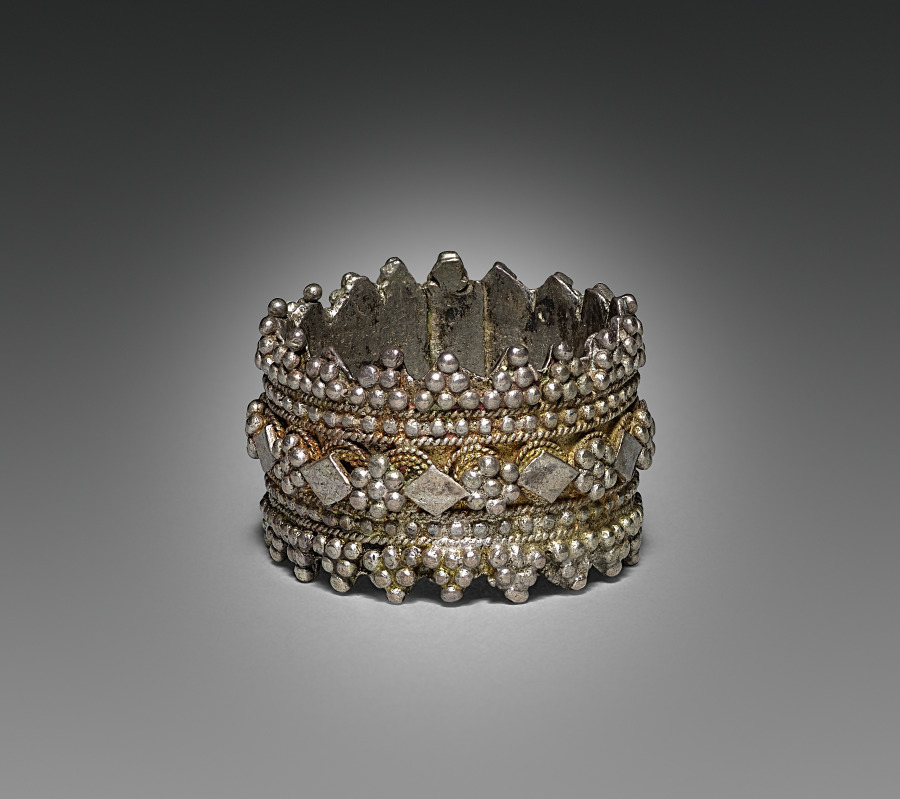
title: Ring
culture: India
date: early 1900s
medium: silver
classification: Jewelry